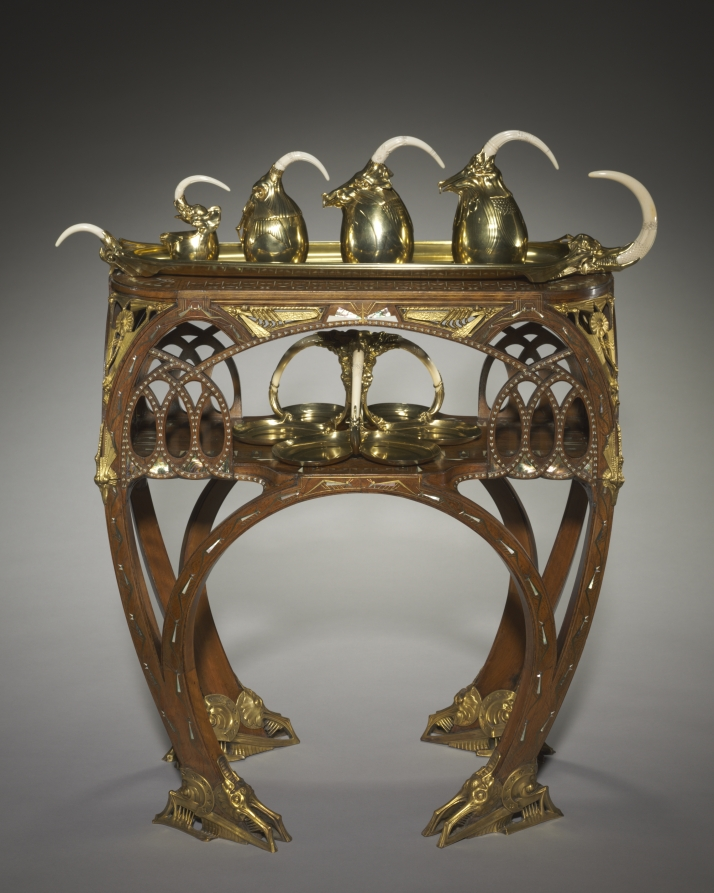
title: Salver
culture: France, Paris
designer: Carlo Bugatti (Italian, 1856–1940)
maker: Adrien-Aurélien Hebrard (French, 1866–1937)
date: c. 1907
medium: Gilt silver and ivory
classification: Silver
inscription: inscribed inside one of six ovoid compartments: "Bugatti" in ligature. Engraved on back: A.A. HEBRAND/ 8 RUE ROYAL/PARIS FRANCE.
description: This tea and coffee service, salver, and table, together with some now missing cups, were all designed by Carlo Bugatti as an ensemble and presented at the 1902 exposition devoted to decorative arts in Turin, Italy. The set was probably acquired from Bugatti's 1907 exhibition at the Galerie Hébrard in Paris by a wealthy South African widow, Anna Blake, who was living there at the time. Some of the animal and insect motifs suggest mythical beasts or the fossils of prehistoric animals. When Mrs. Blake returned to Cape Town, she took these and other pieces designed by Bugatti with her, and they remained in South Africa throughout her lifetime.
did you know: Carlo Bugatti's sons achieved illustrious careers of their own. Rembrandt Bugatti (1884-1916) became a celebrated sculptor, and Ettore Bugatti (1881-1947) manufactured luxurious automobiles and racing cars.